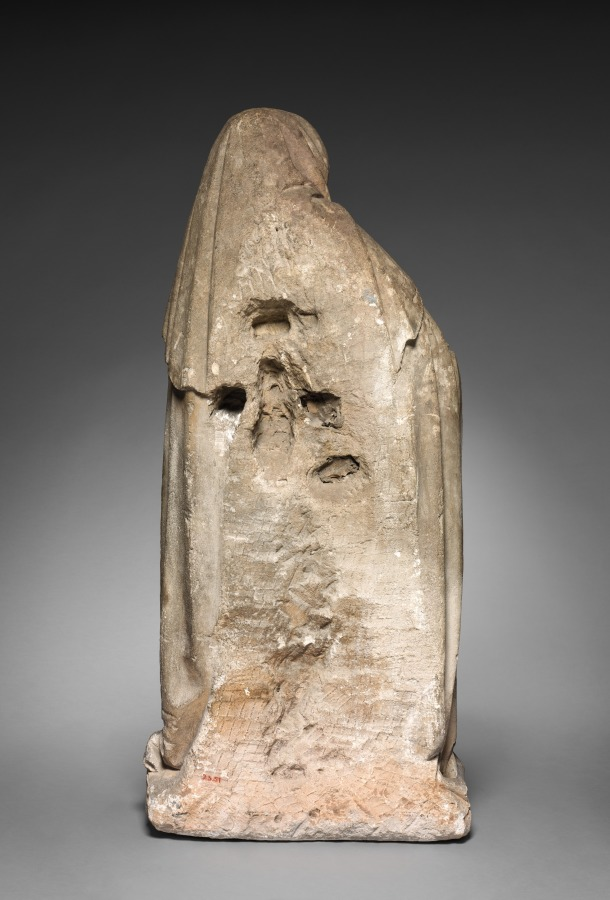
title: Education of the Virgin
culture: France, Bourbonnais, 16th century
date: c. 1500–1510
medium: limestone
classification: Sculpture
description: This relief depicts the young Virgin Mary learning to read at the knee of her mother Anne.